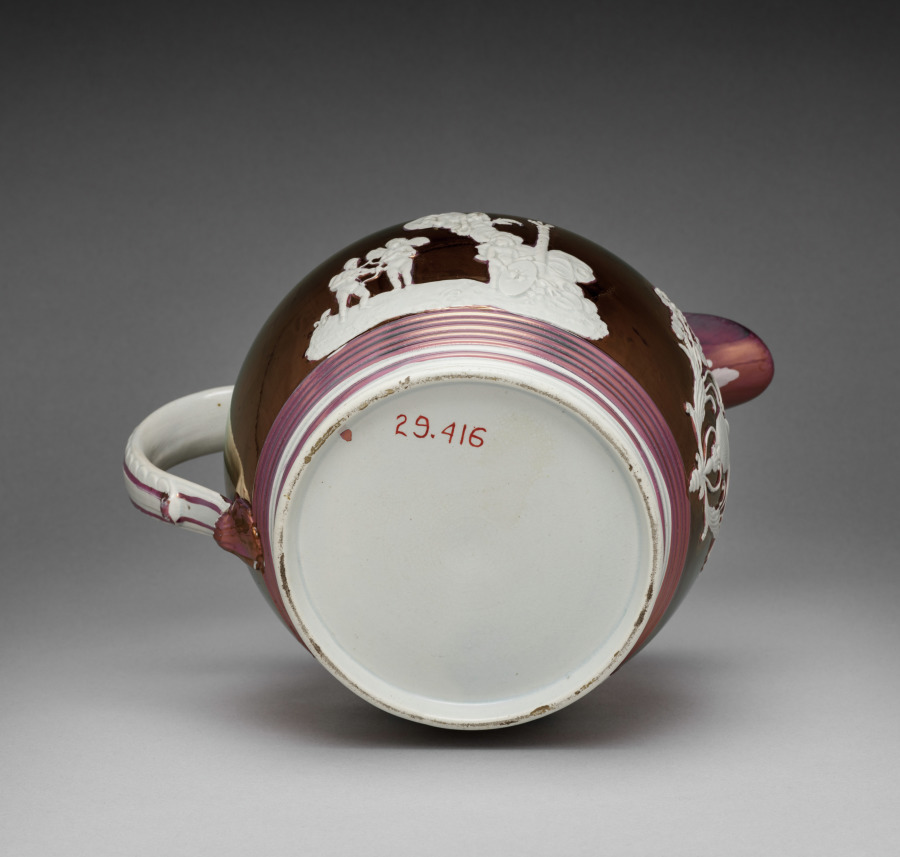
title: Pitcher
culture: England, Staffordshire, 18th century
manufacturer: Staffordshire Factory (British)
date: late 1700s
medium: lusterware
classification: Ceramic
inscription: engraved in script letters on body of pitcher directly under the lip: "T. C. Gibbs."